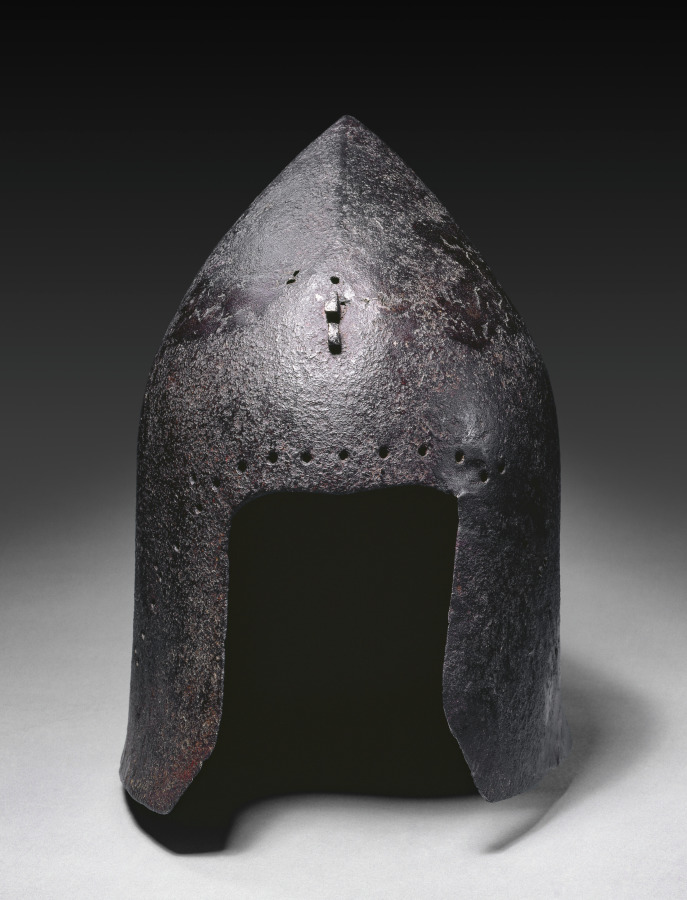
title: Barbute (from the Venetian Garrison at Chalcis)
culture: North Italy, 14th-15th century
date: c. 1350–1420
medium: iron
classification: Arms and Armor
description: This is a rare example of a type of helmet used from about 1350 to 1480. Its conical shape deflected glancing blows to the head. Italian chronicles refer to professional men-at-arms as barbuti. The word derives from the Italian barba, or beard, a reference to the hood of mail often attached to these early helmets. The row of small holes along the face opening and neck were for the attachment of the hood and lining.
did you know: This helmet and a number of others were apparently excavated from the Venetian garrison at Chalcis on the Greek island of Euboea.